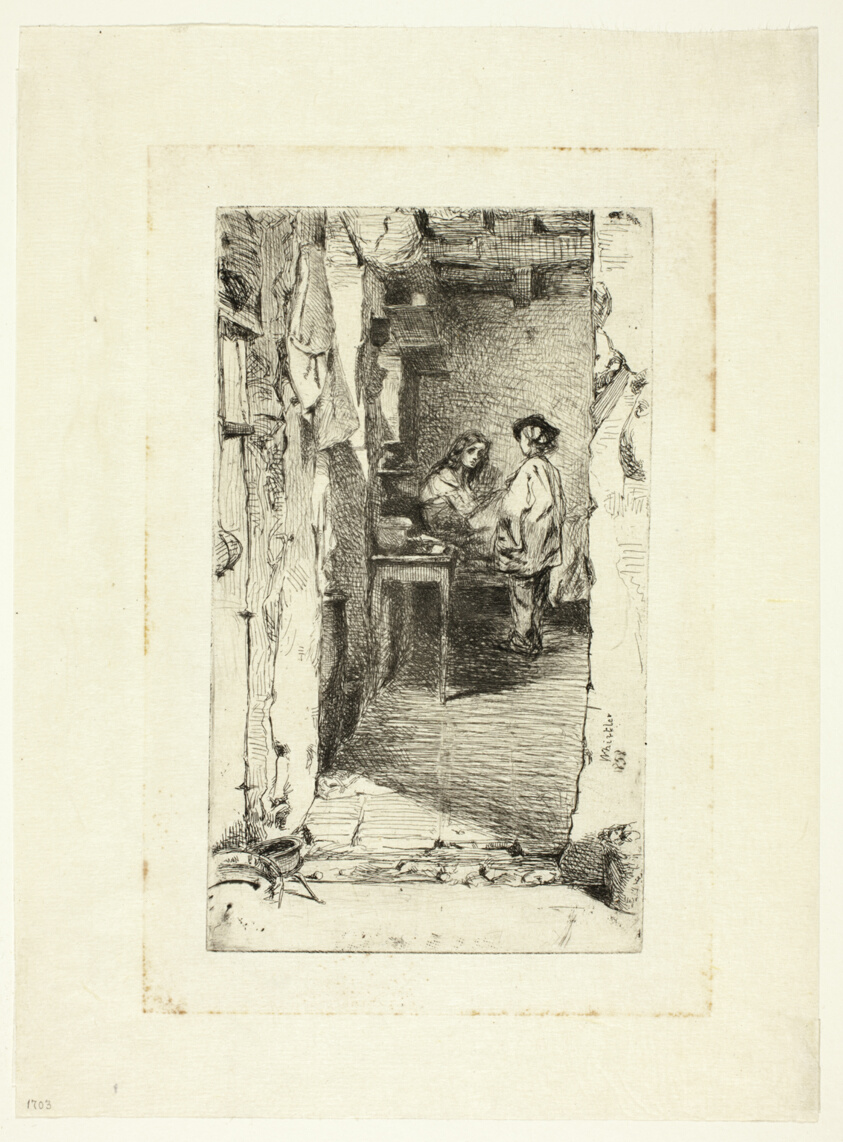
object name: Print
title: Rag Pickers, Quartier Mouffetard, Paris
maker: James McNeill Whistler (American, 1834-1903)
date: 1858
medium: Etching and drypoint in black ink on off-white Japanese paper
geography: United States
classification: etching; print; prints and drawing; paper; drypoint